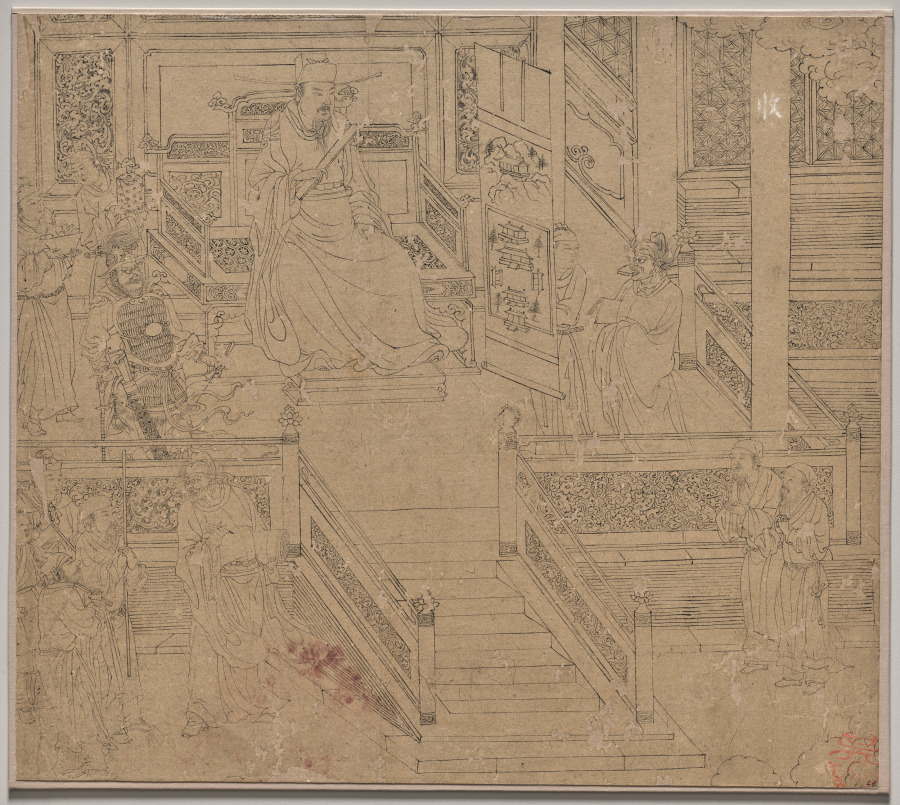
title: Album of Daoist and Buddhist Themes: Kings of Hells: Leaf 29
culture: China, Southern Song dynasty (1127-1279)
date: 1200s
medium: Album, ink on paper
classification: Painting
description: This leaf belongs to the album’s second series of narratives, Ten Kings of Hells. It demonstrates a Chinese-Buddhist approach in which the netherworld is divided into ten realms, each ruled by one of these kings. This particular version portrays the king in a benevolent guise, though his identity remains unclear. He is draped in a robe and holds an ivory plaque. A vertical scroll hangs to his left, depicting in the lower two-thirds a rectangular architectural plan with buildings aligned in a symmetrical arrangement not unlike a Buddhist temple or a Confucian shrine. Above, the scene also features a building and could show a specific mountain. One of the Ten Kings is known as the King of Taishan (or Mt. Tai). This depiction would represent a unique treatment of the king, not shared with other renditions of the same figure elsewhere.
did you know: This King of Hell wears a hat with two slender side arms—similar to the headgear worn by Song dynasty emperors.